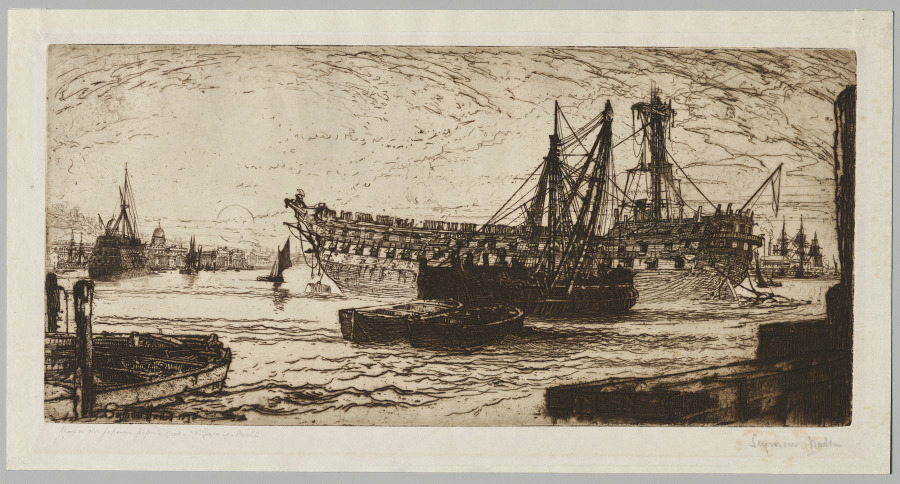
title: Breaking Up of the "Agamemnon," No. 1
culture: England, 19th century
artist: Francis Seymour Haden (British, 1818–1910)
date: 1870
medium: etching and drypoint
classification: Print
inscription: signed by printer in graphite, signed in graphite by Haden on margin and in plate